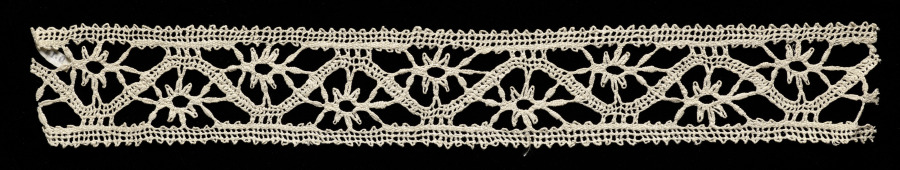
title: Lace Insertion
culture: Italy, Venice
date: 1600s-1630s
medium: Bobbin lace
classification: Lace